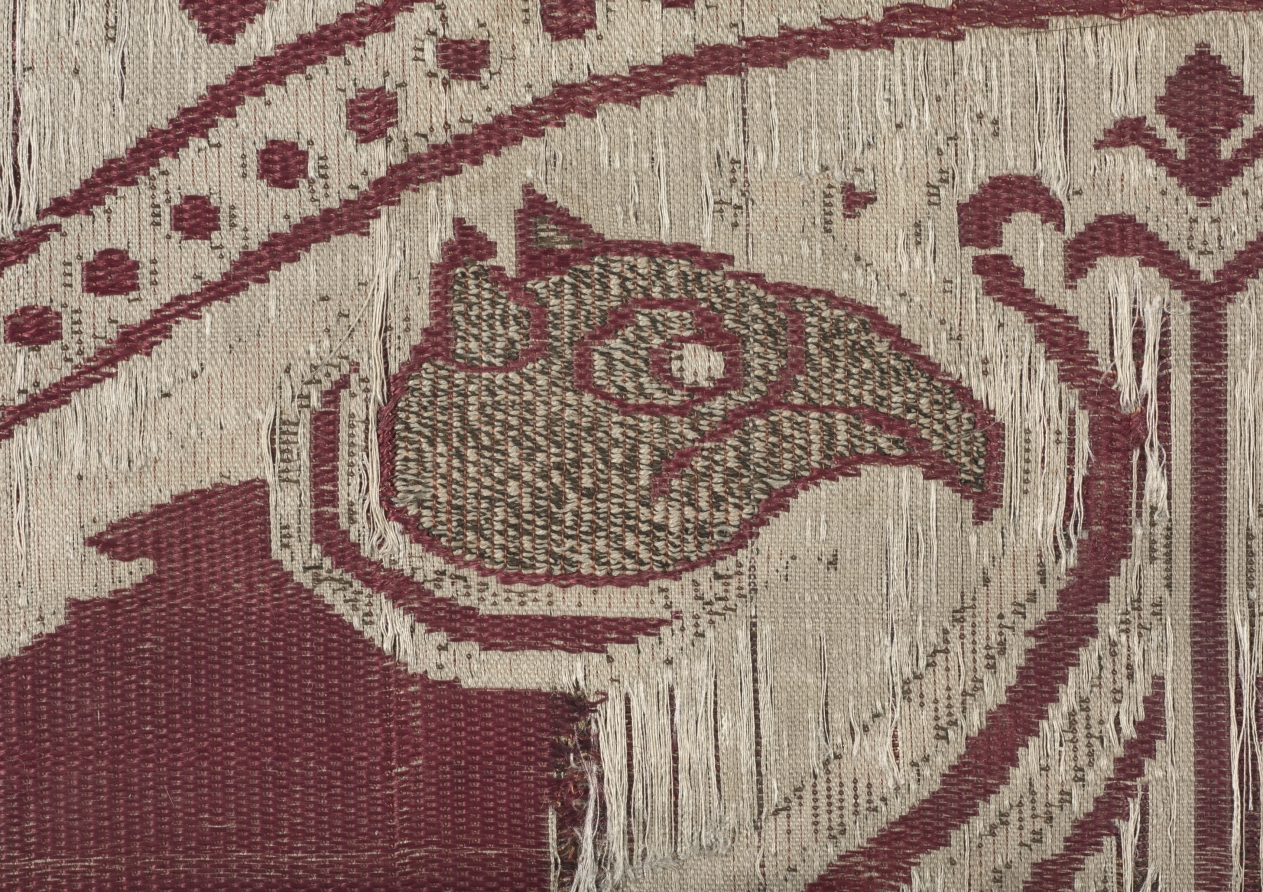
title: Lampas with griffins in roundels, from the Reliquary of Saint Librada in Siguenza Cathedral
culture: Spain, Almeria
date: 1100–50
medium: Silk and gold thread: lampas and plain-weave variant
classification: Textile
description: Mirrored griffins with gold heads dominate these roundels, as they turn their heads unnaturally to stare at each other across their wing tips. The pairs of dragons in the framing border, however, have lost their artistic impact since the green silk thread has disintegrated into brown specks. Luxury silks woven in Islamic Spain were worn by Christian kings throughout Europe. Their patterns also influenced designs in Jewish synagogues and were the standard aesthetic of the elaborately decorated walls in the Muslim Alhambra palace in Granada. This silk is from the reliquary of Saint Librada in Siguenza Cathedral, northeast of Madrid.